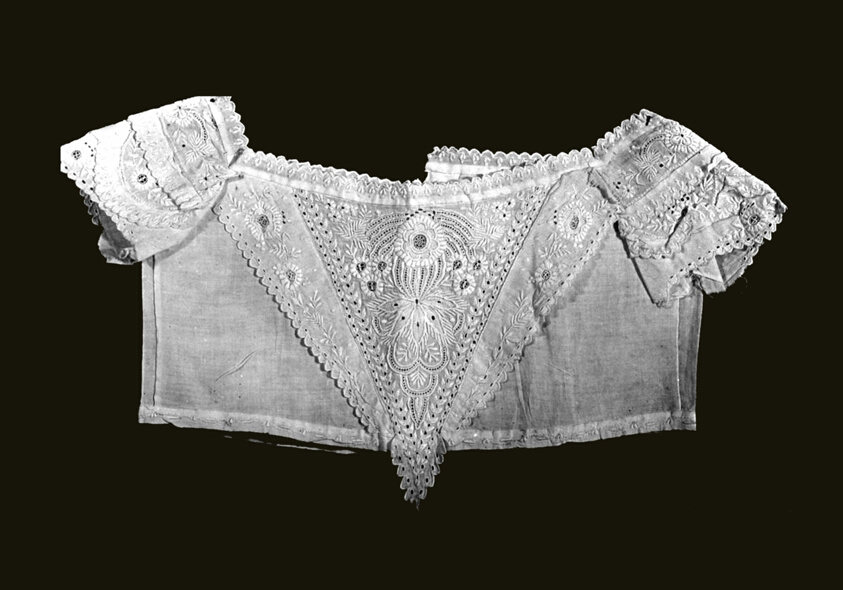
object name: Textile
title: Yoke (For Child's Dress)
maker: United States, Maryland, Baltimore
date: 1890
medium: Linen, plain weave; embroidered in padded satin, straight overcast, buttonhole, back and seed stitches; punched work in curved lines resembling hemstitching; overcast eyelets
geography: Maryland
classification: textile; needlework (visual works); costume; dress (garment); clothing